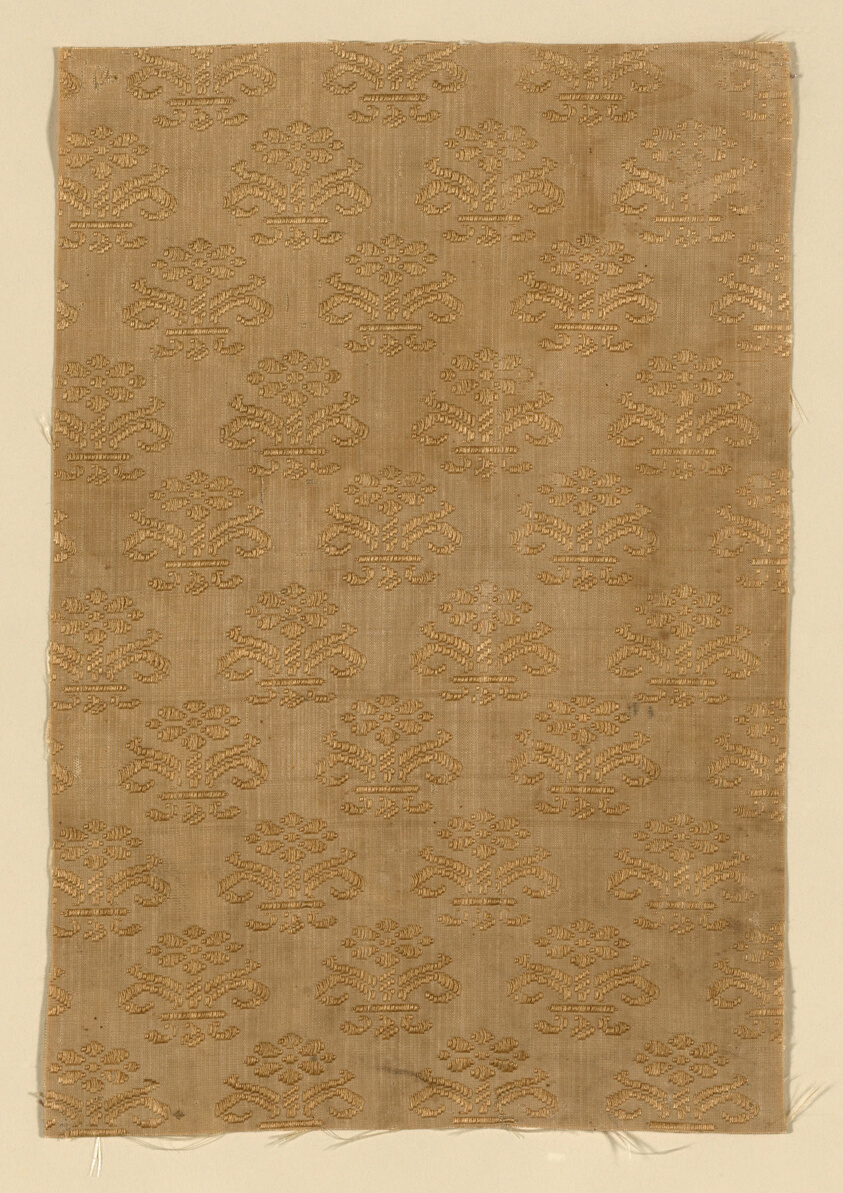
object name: Textile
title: Fragment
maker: Italy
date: 1650/1700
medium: Plain compound cloth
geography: Italy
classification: textile; weaving